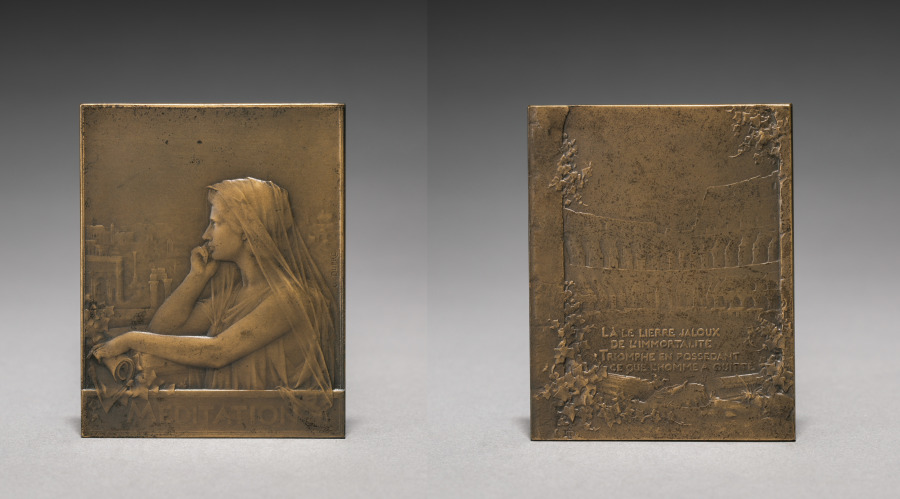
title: Medallion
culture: France, 19th-20th century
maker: Georges Dupré (French, 1869–1909)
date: c.1899–1903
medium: bronze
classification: Metalwork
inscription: "Meditation"; signed: "G. Dupré."